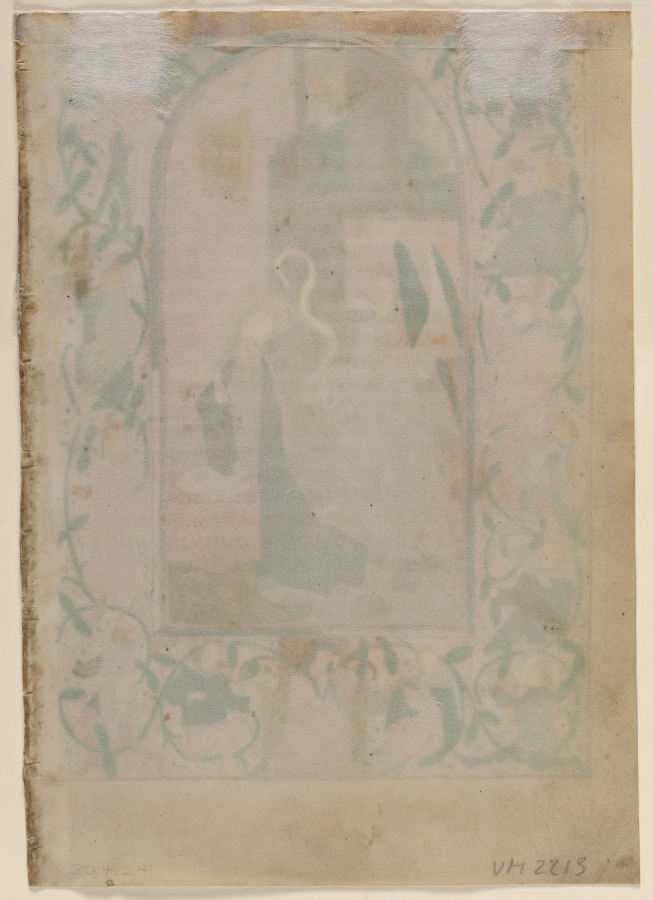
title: Leaf from a Book of Hours: Blank (verso)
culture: Flanders, Ghent (?), 15th century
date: 1470s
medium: ink, tempera and gold on vellum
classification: Manuscript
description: The Annunciation is the traditional introduction to matins, the first of the eight canonical hours. This striking scene recalls the archangel Gabriel's announcement to the Virgin Mary that she was to become the mother of God. The humble scene, steeped in monumentality and innocence, honors one of the most significant moments in Christian history—the coming of God into the world. Flemish artists, in particular, tenderly elaborated this event. The Virgin is usually shown within an architectural interior. Typically her bedroom, this interior space includes a curtained bed, a wooden bench, windows through which a landscape is revealed, and a simple earthenware ewer filled with lilies that proclaim her innocence. Within this private setting, Mary kneels to read from an open book of hours. Her prayer is interrupted by the angel's appearance and she is captured by the artist in stunned surprise. The miniature is accompanied by an illustration in the margins of the Tree of Jesse, the family tree showing Jesus's human descent from Jesse, the father of King David, through the royal house of Judah. The motif begins in the lower margin with the seated Jesse, from whom a tree grows. David, Solomon, and various kings and prophets can be seen in its branches.